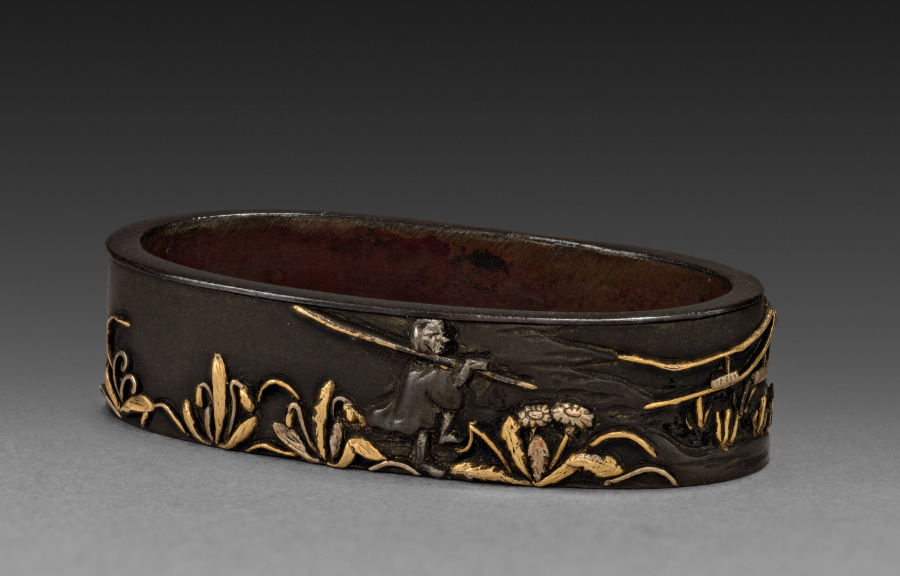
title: Sword-Hilt Collar (Fuchi)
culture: Japan, Edo period (1615–1868)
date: 1700–1850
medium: shakudo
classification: Arms and Armor